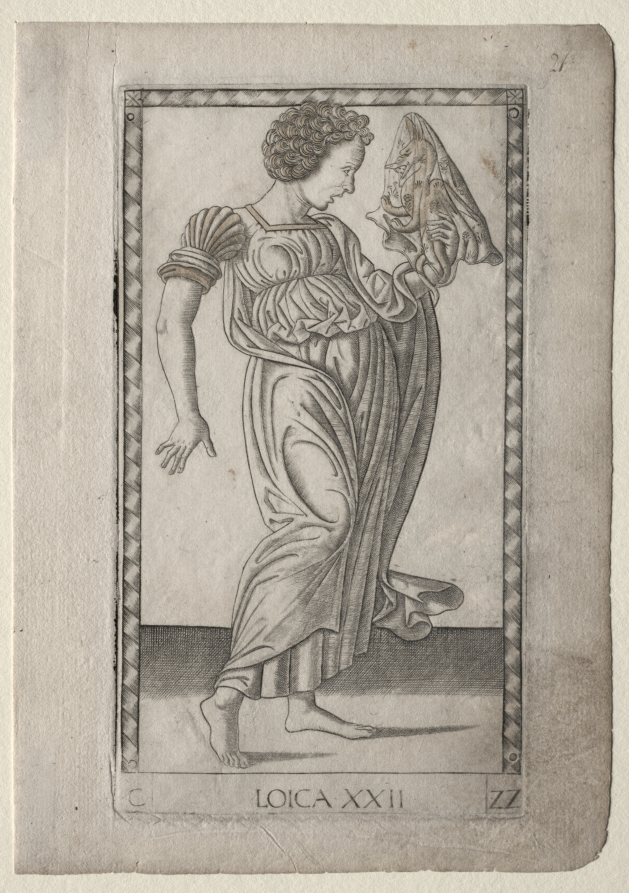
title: Logic (from the Tarocchi, series C: Liberal Arts, #22)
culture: Italy, Ferrara, 15th century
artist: Master of the E-Series Tarocchi (Italian, active 1460s)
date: before 1467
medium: engraving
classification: Print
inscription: Lettered below the image of Loica (Logic): ·C· / ·LOICA·XXII· / ·22·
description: This engraving is part of the group “C” named Liberal Arts. Conceptually, the liberal arts descended from classical antiquity, and were divided into the Trivium (Grammar, Rhetoric, and Dialectic or Logic) and the Quadrivium (Music, Geometry, Arithmetic, and Astronomy). In the Tarocchi set the total number was risen to ten, with the addition of the three disciplines (Poetry, Philosophy, and Theology). The liberal arts denoted knowledge or skills considered necessary to participate in a free society. By the late Middle Ages, they began to be represented in the visual arts as womanlike allegories. Here, Loica (Logic) is personified as a full-length female figure turned to right. Her left hand carries a serpent, covered with a veil.